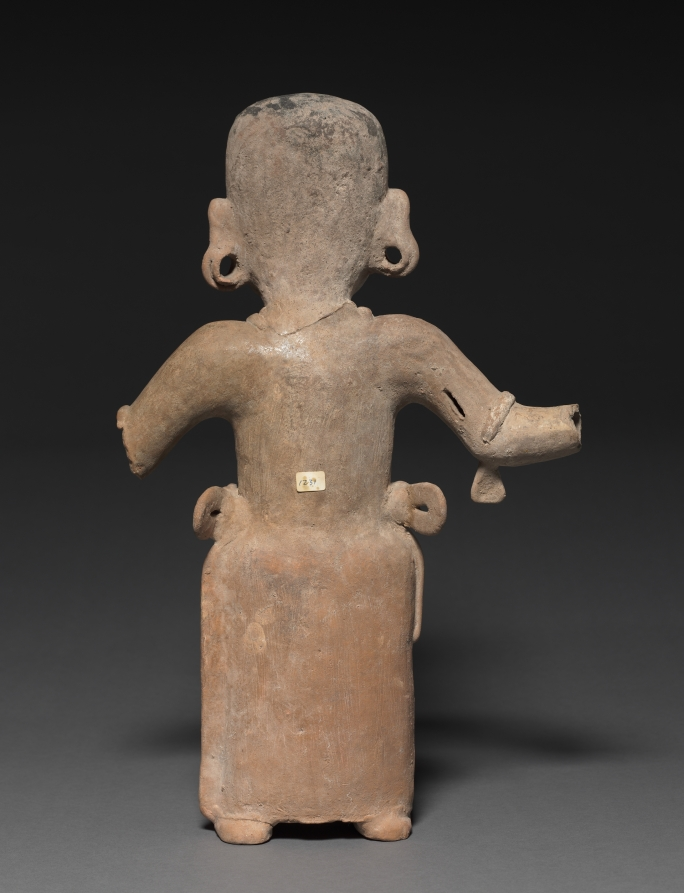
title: Female Figure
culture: Mexico, Southern Veracruz, Limon, Remojades Monumental Sculpture type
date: 200–500 CE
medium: pottery with burnished buff slip and asphalt paint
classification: Sculpture